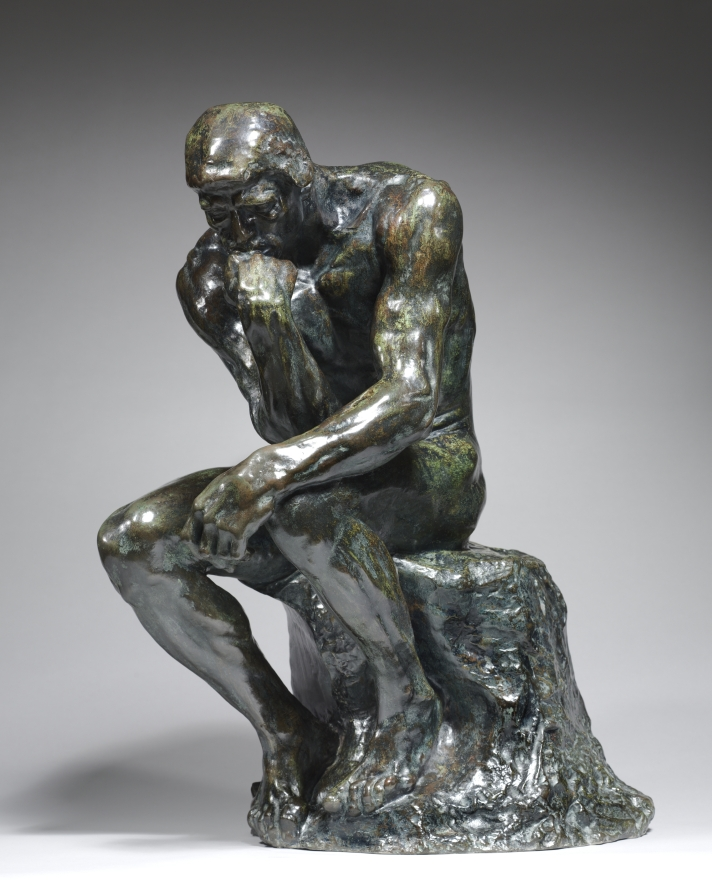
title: The Thinker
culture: France, 19th century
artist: Auguste Rodin (French, 1840–1917)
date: c. 1880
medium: bronze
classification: Sculpture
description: Rodin originally conceived The Thinker as a depiction of the Italian poet Dante Alighieri (1265–1321) sitting in the upper center of a monumental sculptural doorway titled The Gates of Hell (below). Inspired by Dante’s description of a journey through the underworld in his epic poem The Divine Comedy (about 1320), The Thinker contemplates mankind’s fate while gazing at a host of damned figures writhing in anguish below. Stripped of clothing, the figure’s rippling muscles convey an inner, animating life force symbolic of mental activity or creative effort. The figure leans forward, as if ready to spring from his perch, yet seems simultaneously caught in the inaction of deep thought. Rodin produced independent versions of The Thinker, first in this original size and later in a monumental version.